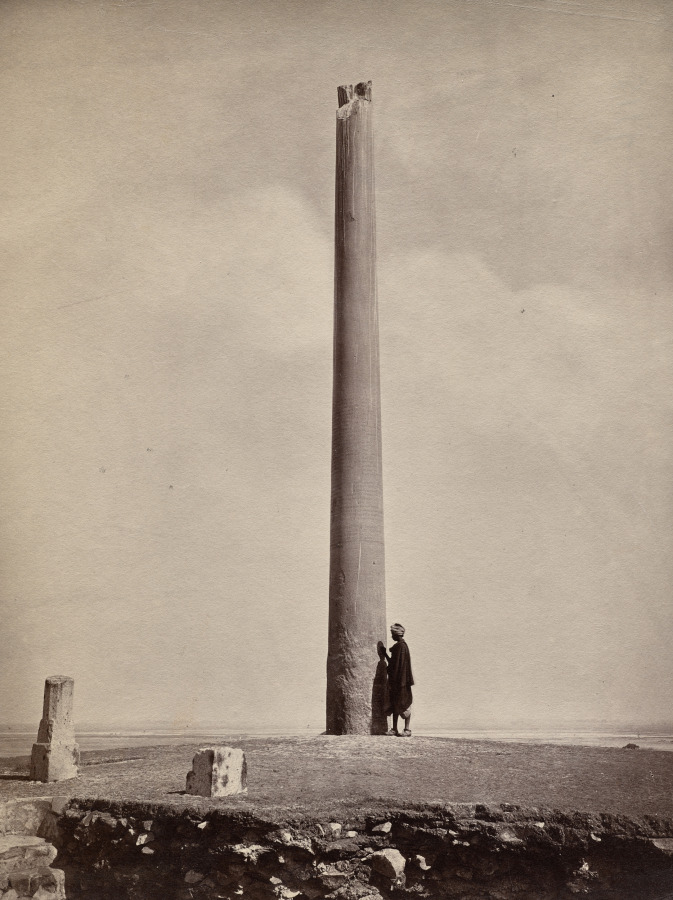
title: Ashoka Pillar moved to its present position by Feroz Shah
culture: England, 19th century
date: 1870s-1880s (?)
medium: albumen print mounted on an album page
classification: Photograph